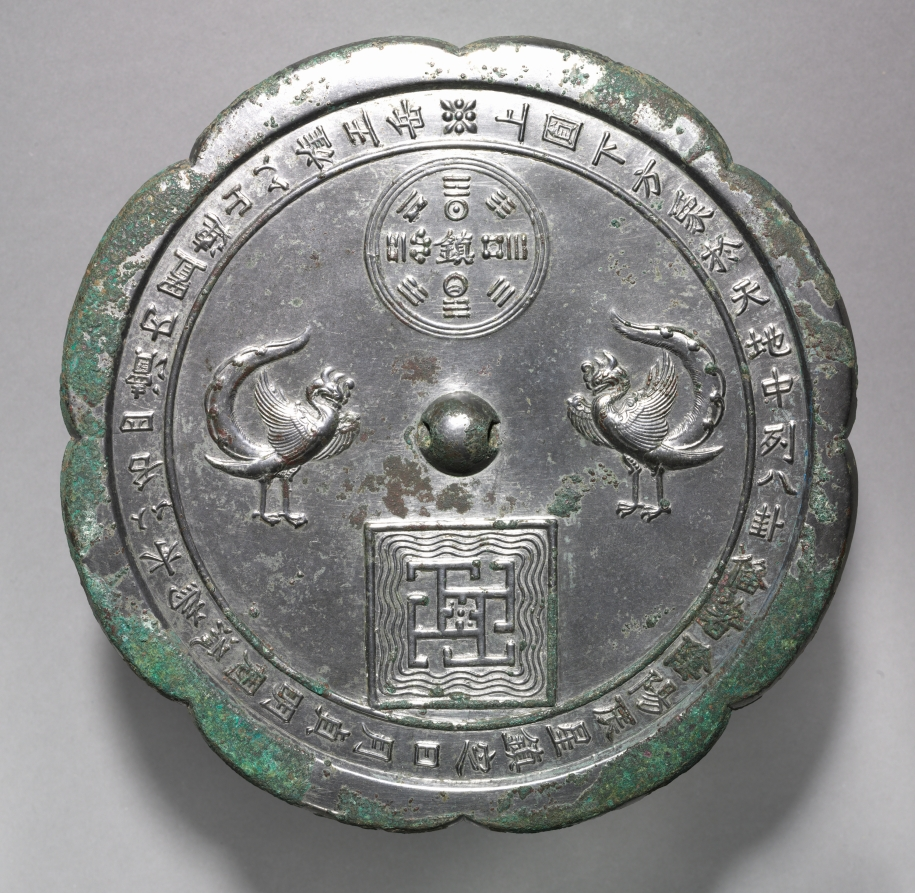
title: Lobed Mirror with Heaven and Earth between the Paired Phoenixes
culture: China, Tang dynasty (618-907)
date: mid to late 700s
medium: bronze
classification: Metalwork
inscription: 上圓下方，象于天地。 中列八填，備著陰陽。 辰星鎮定，日月貞明。 周流為水，以名四瀆。 內置連山，以旌王岳。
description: This mirror bears an important inscription as well as symbolic imagery of the Eight Trigrams and Heaven and Earth to express the ancient Chinese cosmological ideas. The inscription reads: Circle above and square below: These are symbolic of heaven and earth. In the middle are the Eight Trigrams. Making clear [the forces of] yin and yang. Stars and constellations are well aligned; The sun and the moon are virtuous and bright. Circulating around [the earth] is water, Giving identity to the Four Great Rivers. Within are the mountain ranges, To signify the lordly heights.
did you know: This mirror contains cosmological symbolism with heaven represented by a large circle at top and earth by a square at bottom.